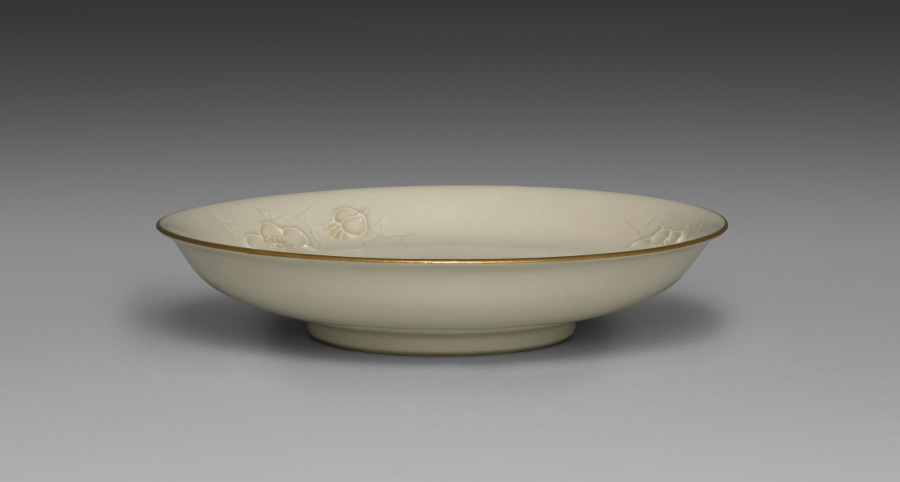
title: Medium-sized Dish from Dining Set with Plum Blossoms and Cracked-Ice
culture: Japan, Meiji period (1868–1912)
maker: Seifū Yohei II (Japanese, 1844–1878)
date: c. 1875–78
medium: Porcelain with molded designs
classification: Ceramic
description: Each item in this set has a delicate low-relief design of flowering plum branches over scattered, intersecting lines meant to resemble the cracked-ice surface of a frozen body of water and is signed on the base in gold pigment. While Yohei II produced many fine works in underglaze blue, like those produced by Kiyomizu Shichibei, he also made works in quite different styles later in his career, from the early 1870 s. In 1873, he was appointed purveyor to the Industrial Center of Kyoto Prefecture, a designation associated with Kyoto’s efforts to reach an international market through the port of Kobe; and from 1875 until his death, he was involved in national-level projects to present Japanese ceramics across the world. It was during this period that Yohei III was apprenticed to Yohei II, and it has been suggested that this set may in fact be an early example of Yohei III’s work, which he signed with his teacher’s name. Decorated with flowers resembling Japanese textile motifs, the set calls to mind the design of Yohei II’s pair of vases with plum blossoms in the Victoria and Albert Museum. Here, the elaborate trees created for a formal public exhibition setting have been translated into the approachable blossoms of the genteel domestic environment. While the designs are consistent across the pieces, each raised flower petal and pistil and each incised line in the ice was done by hand, so the cups, bowls, and dishes are similar yet unique. The bottoms of two boxes once identified the set’s owner, but the information has been deliberately obscured with black ink. However, inscriptions still visible appear to indicate two occasions, once at the end of July 1886 , and once again in June 1916 , when parts of the set were requested from Hokura in Niigata Prefecture. The location corresponds to a neighborhood in the present-day city of Jōetsu. The surname Tsuji 辻 also appears on a paper tag affixed to one of the box cloths. Future research may possibly reveal more about their provenance. A vase by Yohei III in a private collection combines the formal grandeur of the Yohei II vases in the Victoria and Albert Museum with the gentler design of this dining set, placing flowering plum trees against soft, scalloped-edge clouds resembling those in golden screens.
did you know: The dining wares have a creamy white coloration that the four boxes containing them identify as Korean in style.